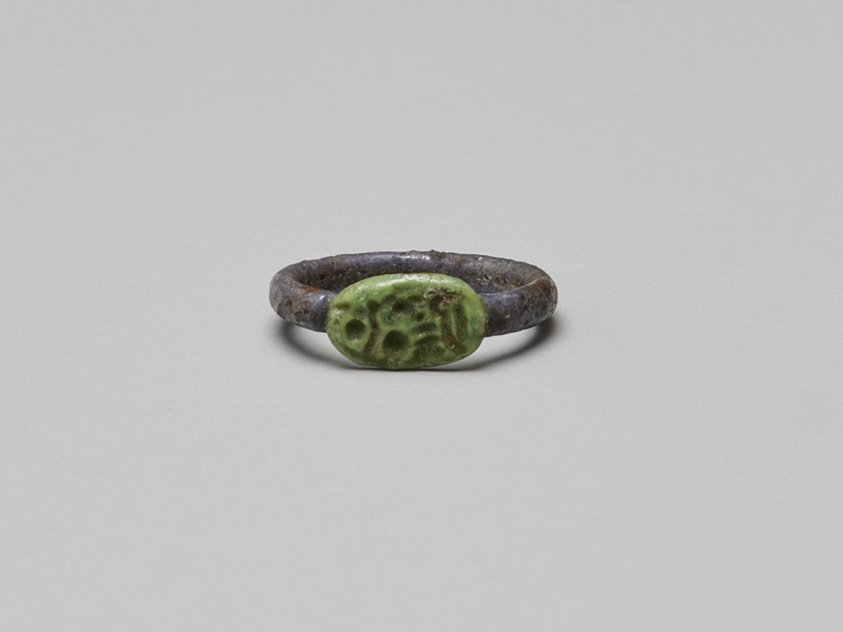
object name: Costume and Accessories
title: Finger Ring with the Throne Name of King Psusennes II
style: third intermediate period, twenty-first dynasty, egyptian, ancient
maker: Egyptian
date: Third Intermediate Period, Dynasty 21, reign of Psusennes II (about 959–945 BCE)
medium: Faience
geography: Egypt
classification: ring (jewelry); ceramics; jewelry; ancient art; costume; faïence (composite material)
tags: Hieroglyphs, pharaohs, kings